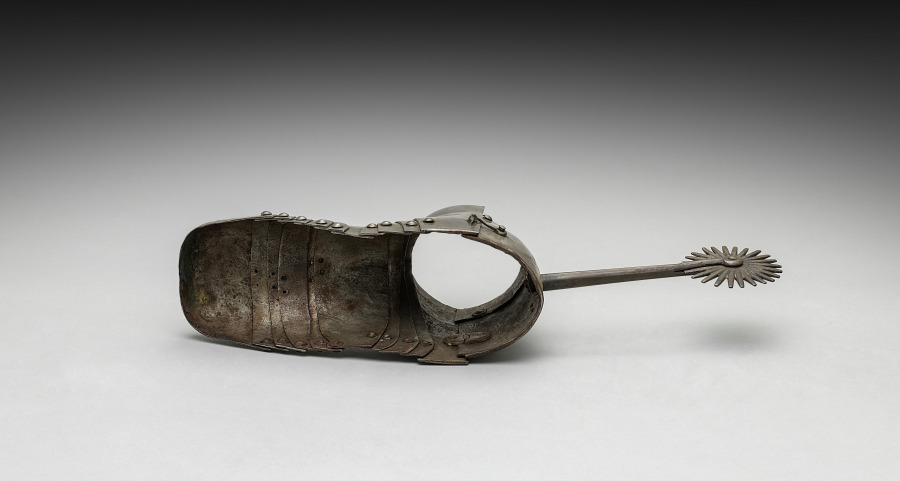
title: Right Sabatoun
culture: Germany, 19th century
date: 1801–1900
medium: steel with black paint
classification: Arms and Armor